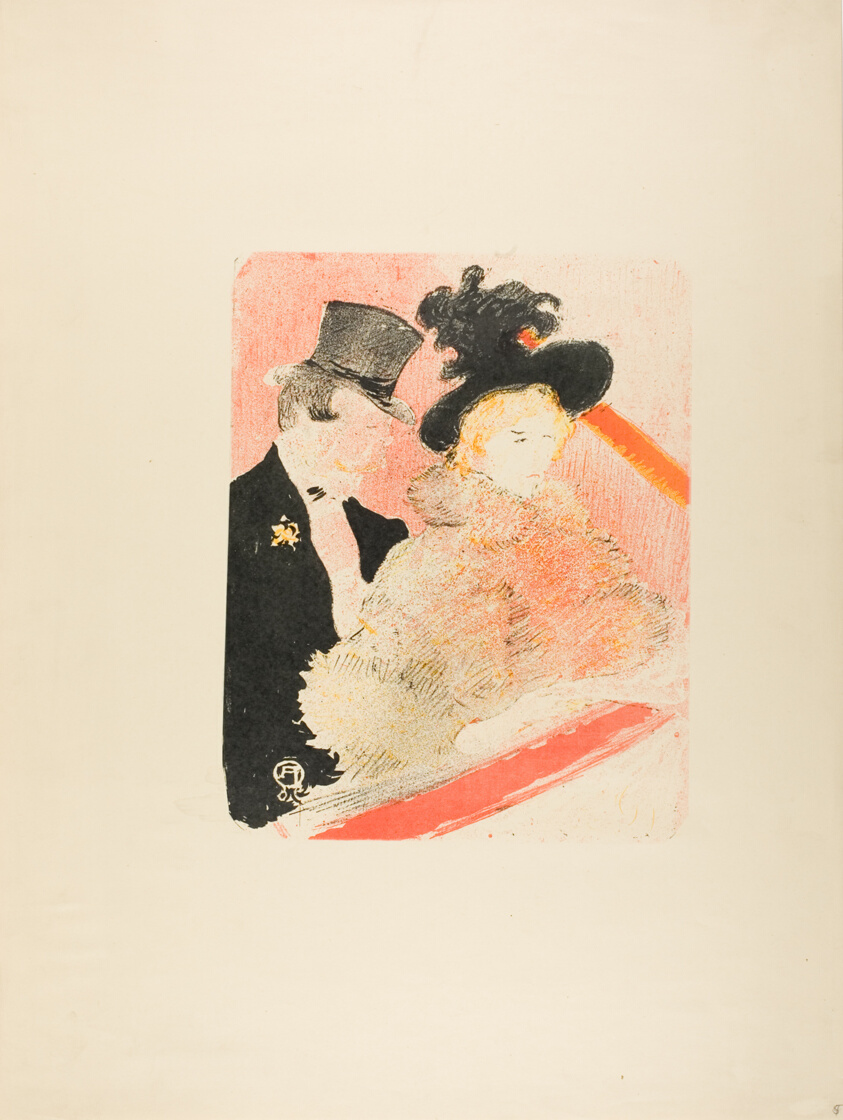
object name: Print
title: At the Concert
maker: Henri de Toulouse-Lautrec (French, 1864-1901)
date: 1896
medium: Color zincograph on cream wove paper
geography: France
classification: zincograph; print; prints and drawing